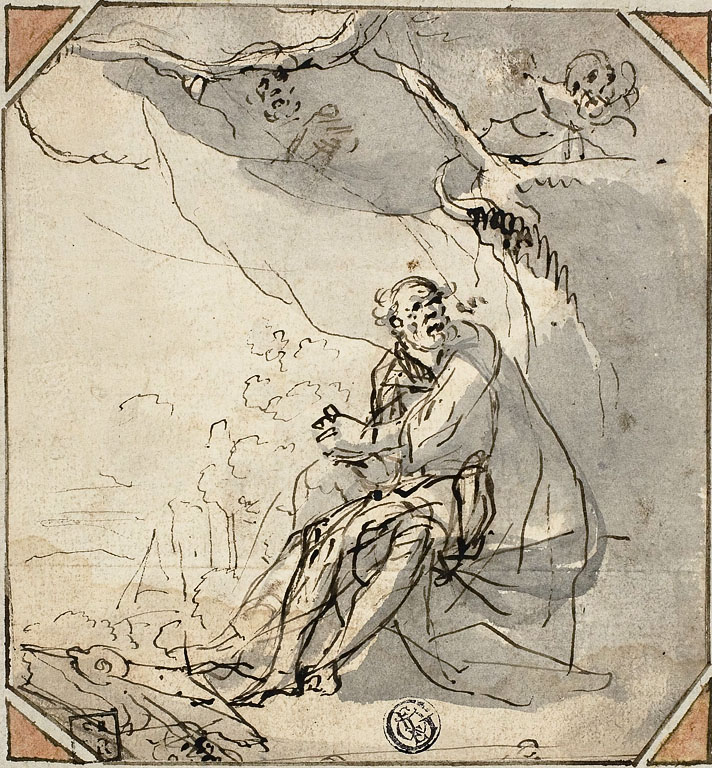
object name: Drawing and Watercolor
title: Hermit Saint in Cave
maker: Unknown Artist; Italian, 17th century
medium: Pen and brown ink, with brush and gray wash, on ivory laid paper, laid down on off-white laid paper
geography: Italy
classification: pen and ink drawings; drawings (visual works); prints and drawing